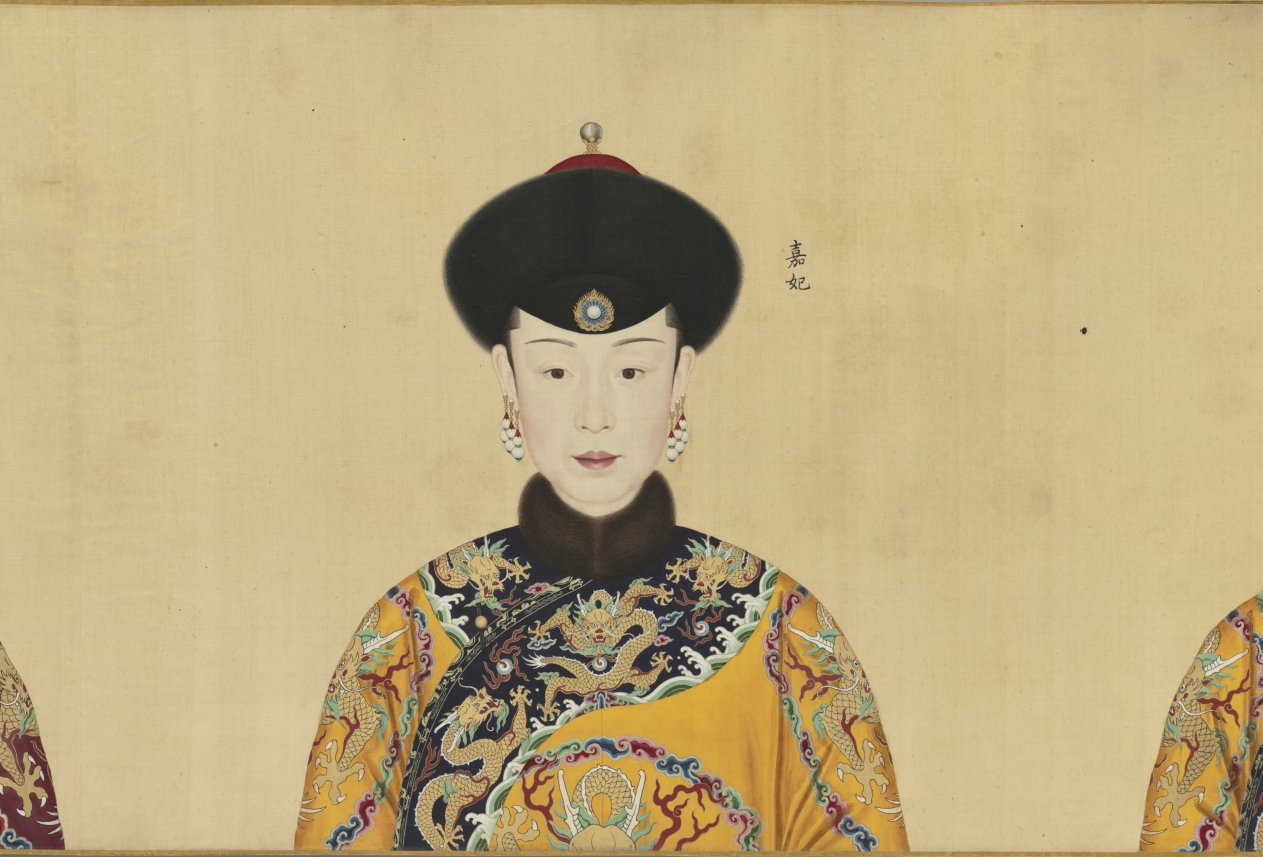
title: Portraits of the Qianlong Emperor and His Twelve Consorts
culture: China, Qing dynasty (1644–1911), Qianlong reign (1736–95)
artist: Giuseppe Castiglione (Italian, 1688–1766)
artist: and others (Chinese)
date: 1736–70s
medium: Handscroll; ink and color on silk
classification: Painting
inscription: 9 seals of the Qianlong emperor (r. 1736–95).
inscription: The eighth month, first year of Qianlong [1736] 乾隆元年八月吉日. The Empress (Xiaoxian) 皇后 (1712–1748), The Guifei (Huixian) 貴妃 (?-–1745), Chunfei 純妃 (1713–1760), Jiafei 嘉妃 (?–1755), Lingfei 令妃 (1727–1775), Shufei 舒妃 (1728–1777), Qingbin 慶嬪 (1724–1774), Yingbin 穎嬪 (1731–1800), Xinbin 忻嬪 (?–1764), Dunfei 惇妃 (1746–1806), Xunfei 順妃 (1749–1788), Shunbin 循嬪 (?–1797).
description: This portrait shows the Qianlong emperor at 26, in the first year of his reign. His likeness is followed by portraits of the empress and eleven consorts. Their portraits document the appearances of the court women around the time when they received their respective imperial titles, which occurred at different stages of the emperor's life. The first three portraits were done by the Jesuit (Roman Catholic) missionary artist Giuseppe Castiglione, whereas the later ones were by Chinese court painters. Formal portraiture contributed to the affirmation of status and construction of role and identity. This scroll served as both familial documentation and a "mind picture" of the Qianlong emperor, suggesting that his constructed image of emperorship was inseparable from concepts of self and family. It was stored in a carved red lacquer box bearing the original painting title Mind Picture of a Well-Governed and Tranquil Reign (see CMA 1969.32).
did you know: Lingfei 令妃 (1727–1775), the first consort depicted in the maroon or “incense-colored" 香色 robe, was the mother of six of Qianlong’s children, including the future Emperor Jiaqing.